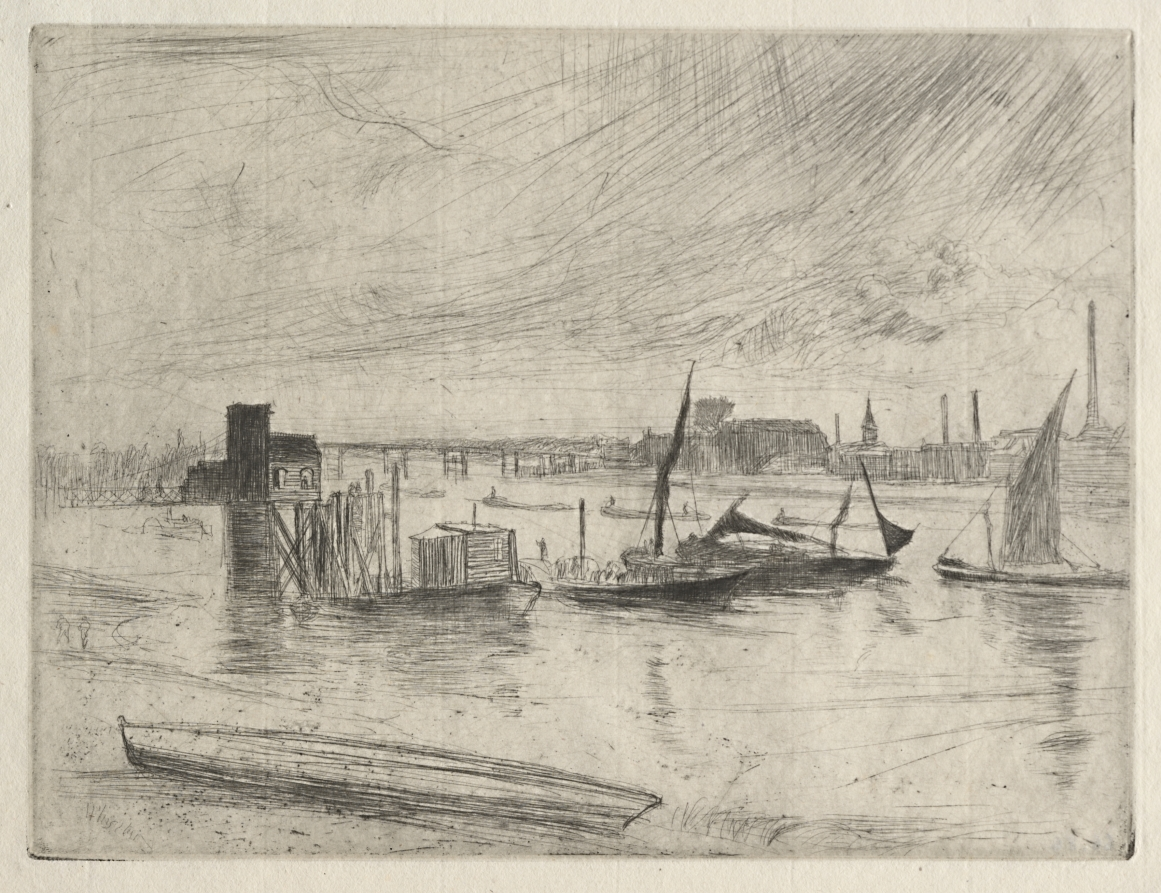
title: Early Morning Battersea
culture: America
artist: James McNeill Whistler (American, 1834–1903)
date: 1861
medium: etching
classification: Print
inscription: signed lower left on plate: Whistler